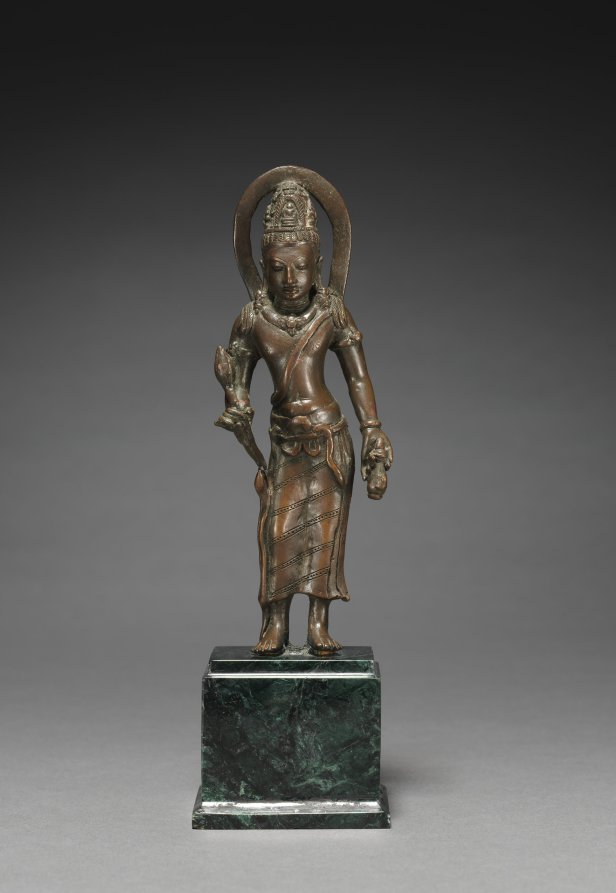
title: Padmapani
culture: Java, Pagan, Sailendra Period, 8th-9th Century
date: 700s-800s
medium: copper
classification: Sculpture